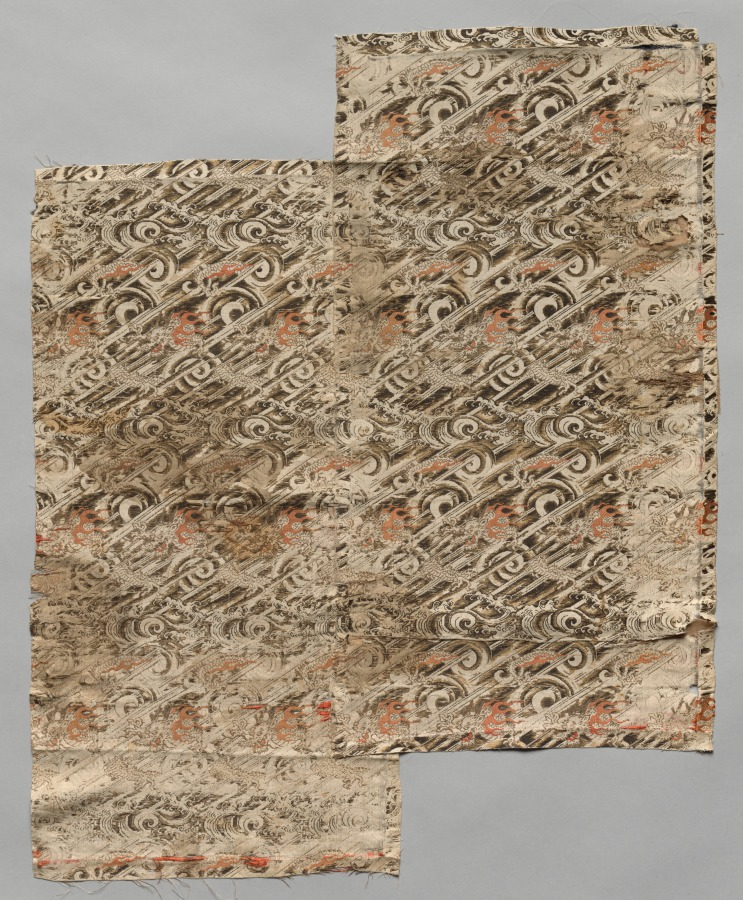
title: Brocaded Silk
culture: Japan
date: 1700s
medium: silk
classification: Textile